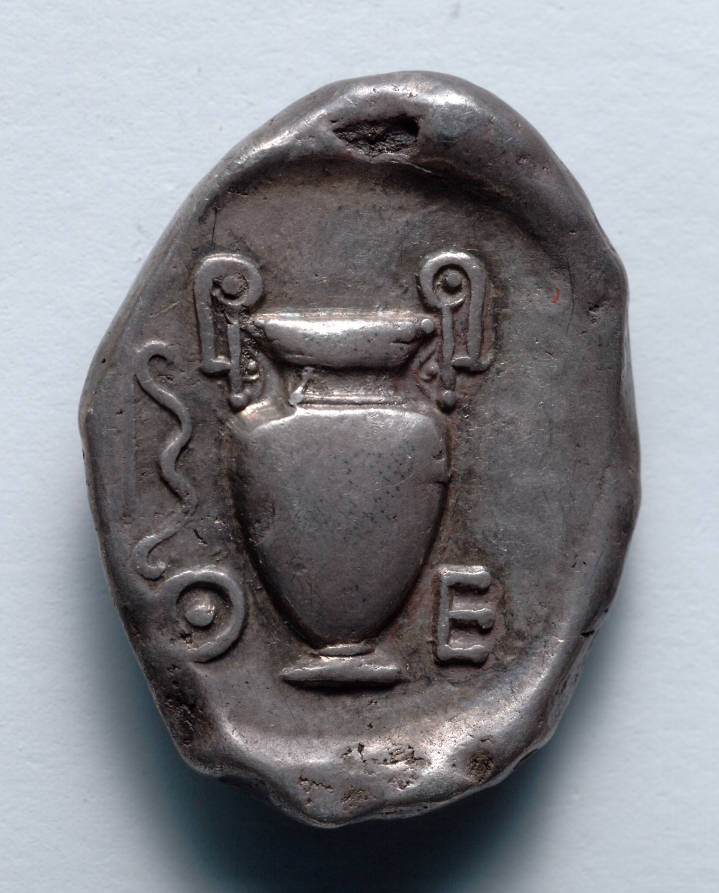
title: Stater: Volute Krater, Bow, within Incuse Circle (reverse)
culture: Greek, minted at Thebes (Boiotia)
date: 395–387 BCE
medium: silver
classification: Coins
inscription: Θ | Ε